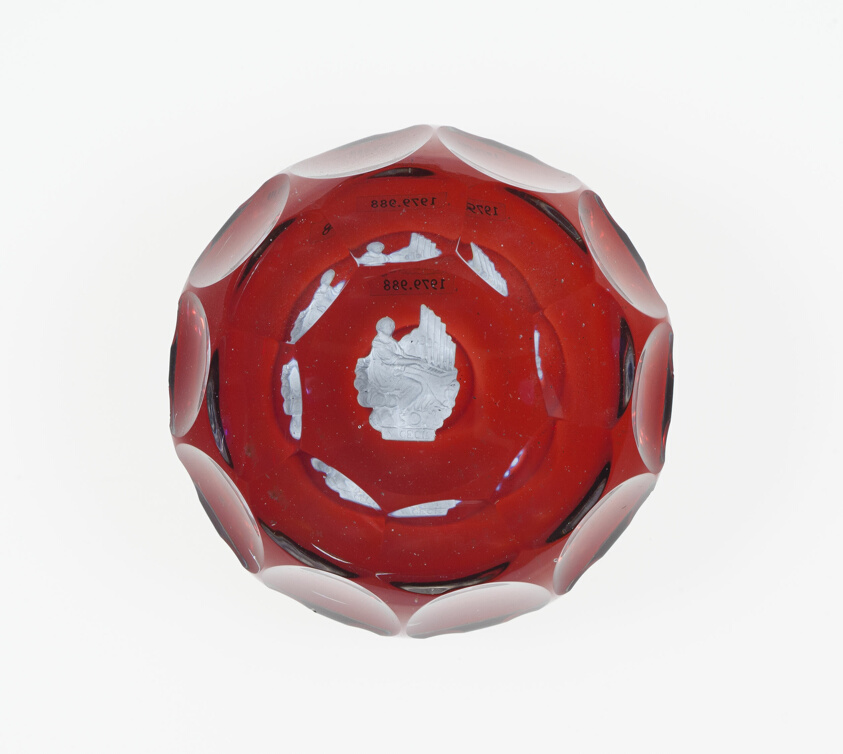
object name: Glass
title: Paperweight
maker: Baccarat Glassworks (Cristalleries de Baccarat); Lorraine, France, founded 1764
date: c. 1846–55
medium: Glass, sulphide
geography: Lunéville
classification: glass; european decorative arts; paperweight